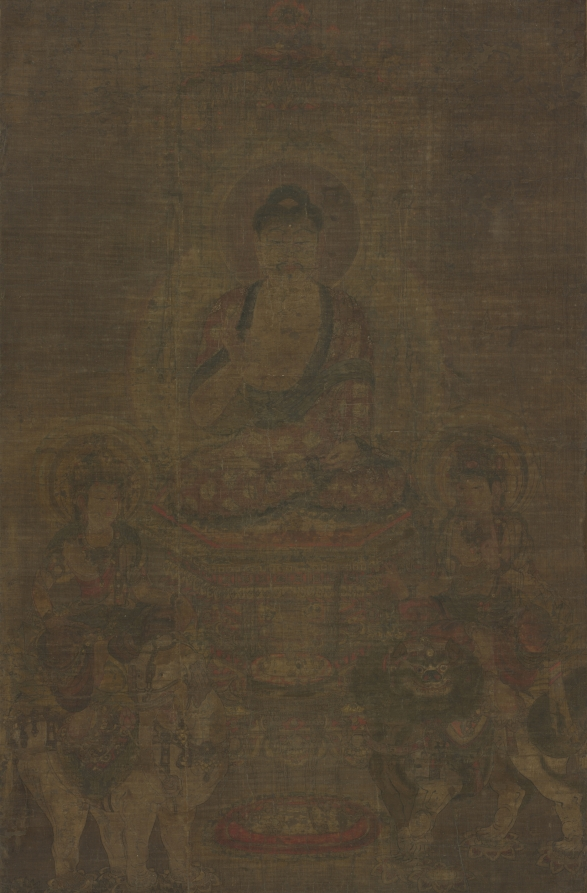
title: Shakyamuni Triad: Buddha Attended by Manjushri and Samantabhadra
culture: China, Tang dynasty (618-907)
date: c. 900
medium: Hanging scroll; ink and color on silk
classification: Painting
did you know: Samantabhadra rides a six-tusked white elephant, while Manjusri is seated upon a lion.